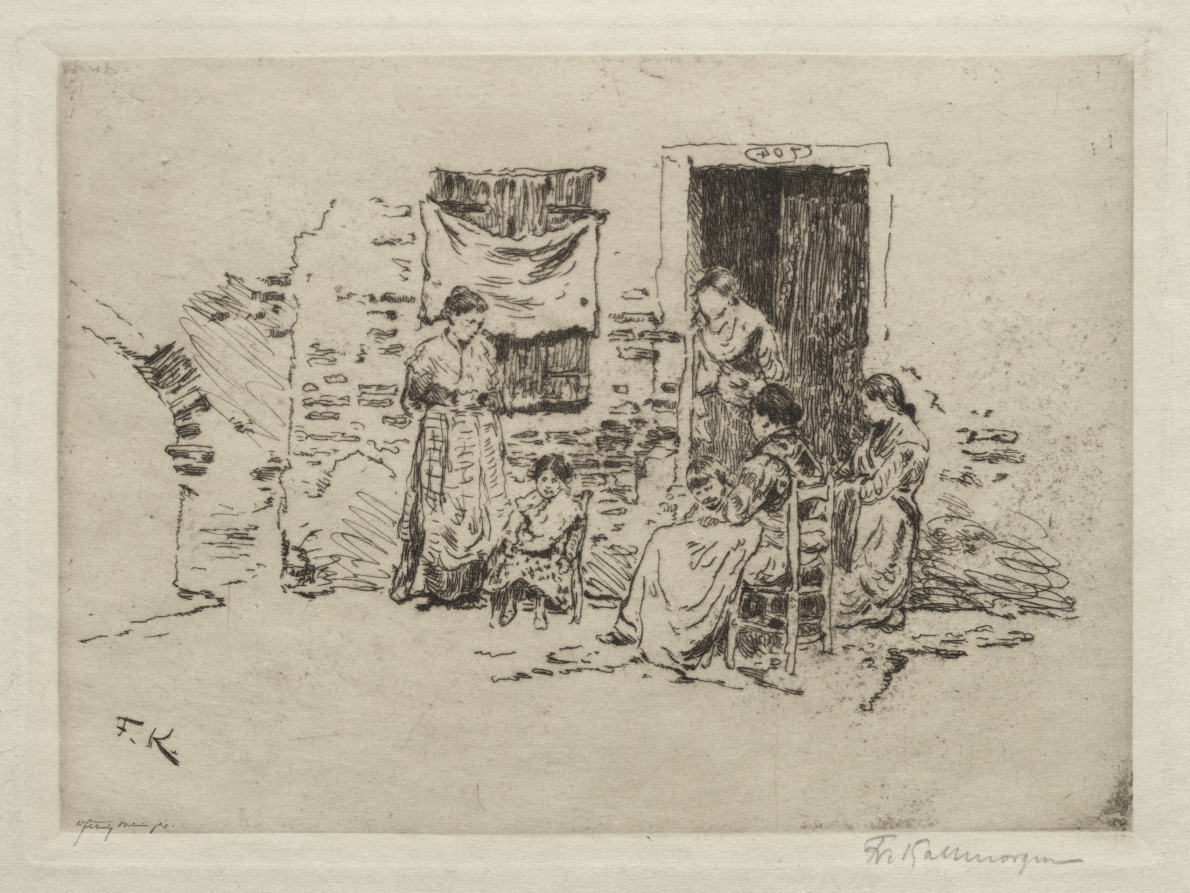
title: Chioggia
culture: Germany, 19th century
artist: Friedrich Kallmorgan (German, 1856–1924)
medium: etching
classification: Print